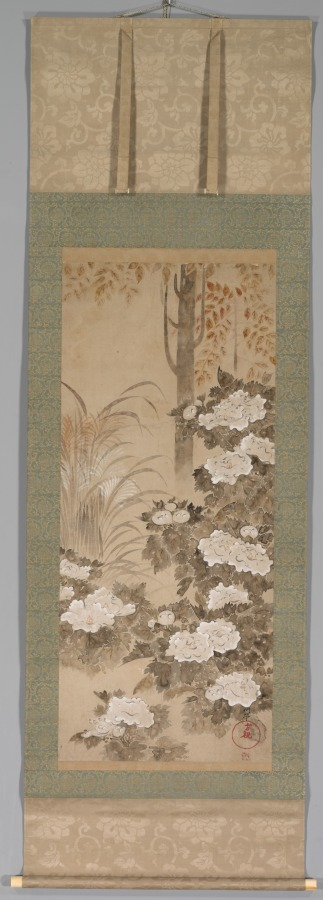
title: Peonies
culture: Japan, Edo period (1615–1868)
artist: Tatebayashi Kagei (Japanese, active mid-1700s)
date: mid 1700s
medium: hanging scroll; ink and color on paper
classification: Painting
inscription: lower right, Kagei's signature in black, a round red seal and a small square one.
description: A proliferation of white tree peonies dominates this composition. Behind them are tall, feathery-topped susuki grasses and leafy deciduous trees. Tatebayashi Kagei restricted his palette to ink with red and white color, along with sparing use of green in the peony leaves and the blades of grass. He made generous use of the “dripping-in” (tarashikomi) technique, layering pooled ink and color, in the peony leaves. The areas left in reserve create the impression of insect-eaten or late season foliage.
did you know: In 1738, Kagei received a copy made by Ogata Kōrin of a fan painting by Tawaraya Sōtatsu from Kōrin's brother Ogata Kenzan, so some think he trained with Kenzan in Edo (present-day Tokyo).